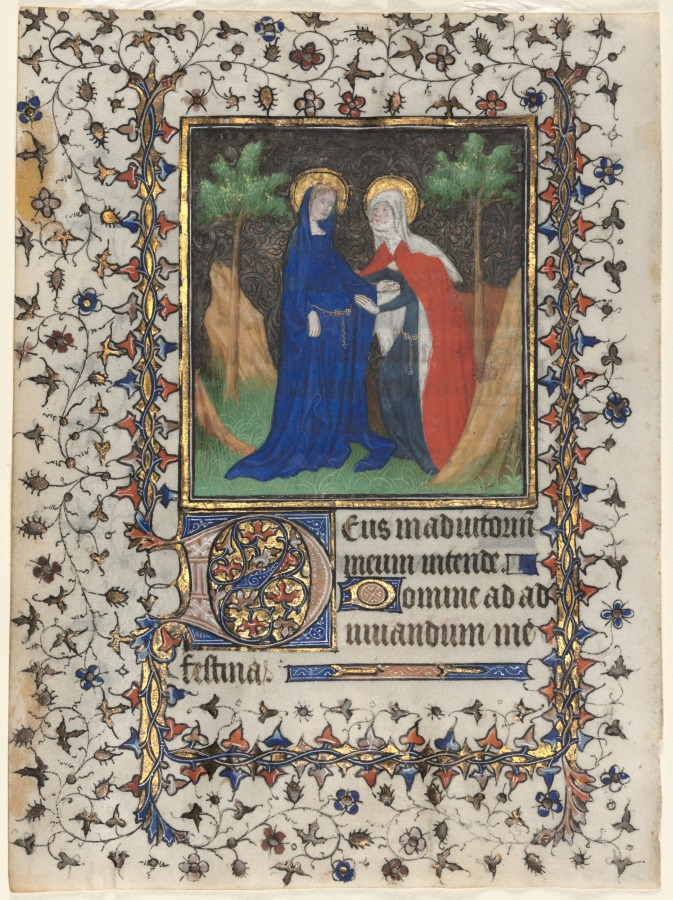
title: Leaves from a Book of Hours: The Visitation and Christ in Judgment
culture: France, Paris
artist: workshop of Boucicaut Master (French, Paris, active about 1410–25)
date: c. 1415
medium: ink, tempera, and gold on vellum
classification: Manuscript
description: The heart of every book of hours is the Hours of the Virgin. With this set of prayers, the reader asked the Virgin Mary to intercede on their behalf. The prayers come mostly from the Bible and include psalms, hymns, and readings. The Hours of the Virgin emerged from the eight “hours” of the day in the monastic world’s routine of daily prayers from daybreak to late at night. Originally used solely by the ordained, by the 1000s, these prayers had spread to the general population through their inclusion in books of hours. This section is traditionally illustrated by images from the life of the Virgin Mary, with each hour featuring a different event. The scene of the Visitation opens lauds, the prayers said at night or upon rising.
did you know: Highly customizable, the order of a book of hours shifts, and individual prayers vary, sometimes significantly, from region to region.